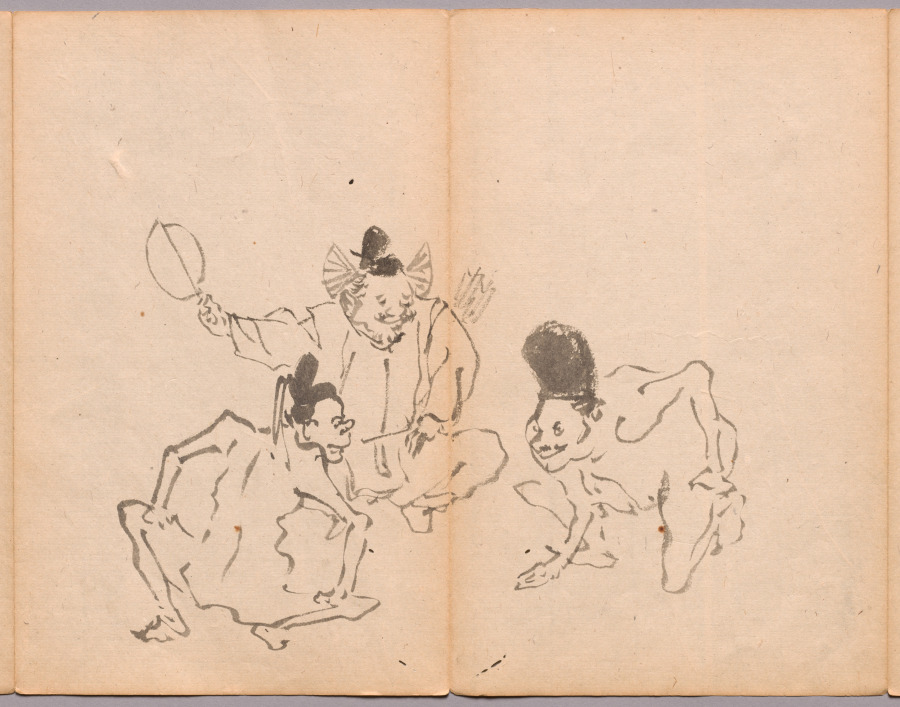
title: Wrestling Match from Sketch Album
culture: Japan, Edo period (1615–1868) to Meiji period (1868–1912)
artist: Kawanabe Kyōsai (Japanese, 1831–1889)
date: mid- to late 1800s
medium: Accordion-style book of 26 double-leaves; ink and color on paper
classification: Bound Volume